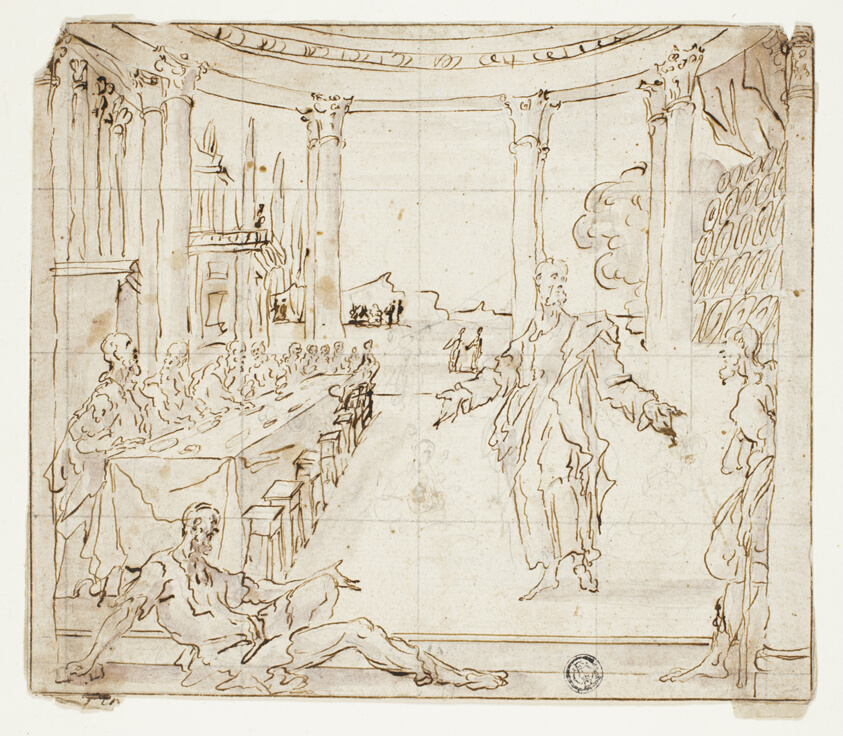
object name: Drawing and Watercolor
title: Feast in the House of Simon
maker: Probably Giovanni Battista Lanzeni (Italian, c.1660-1737); or possibly Giovan Gioseffo dal Sole (Italian, 1654-1719); or Unknown Artist, (Italian, 16th-17th century)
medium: Pen and brown ink, with brush and lavender wash, with graphite, squared in graphite, on ivory laid paper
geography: Italy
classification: pen and ink drawings; drawings (visual works); prints and drawing